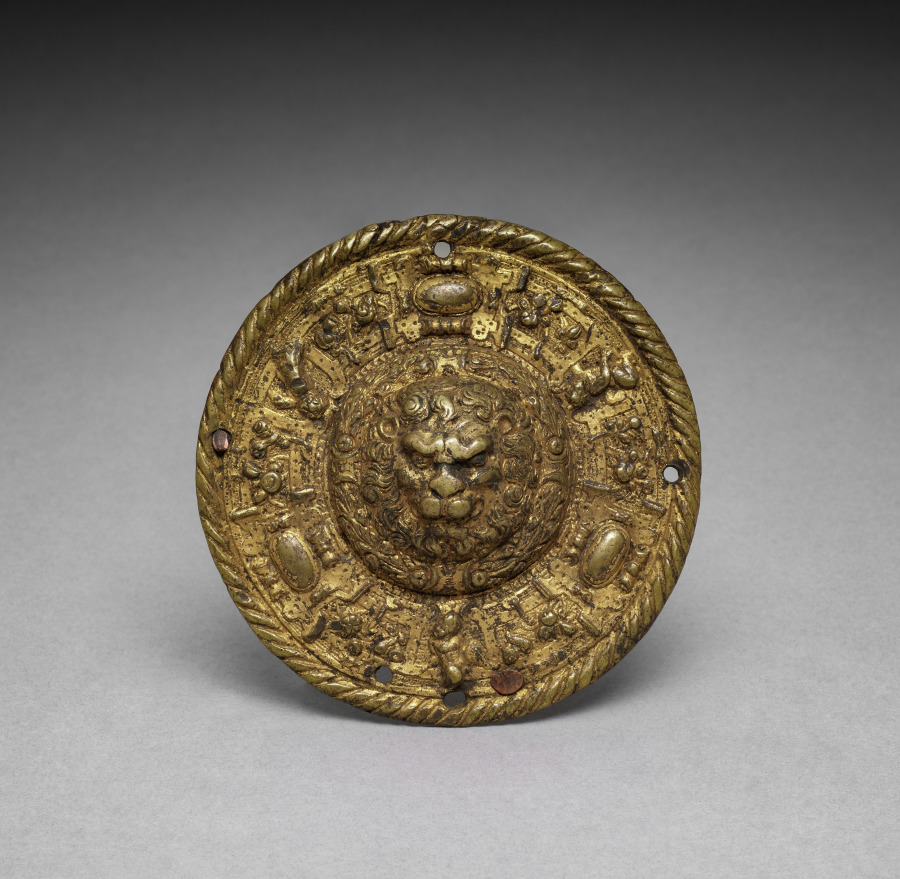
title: Shield Boss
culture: Italy, Renaissance Style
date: 1800s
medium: brass, gilded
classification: Arms and Armor